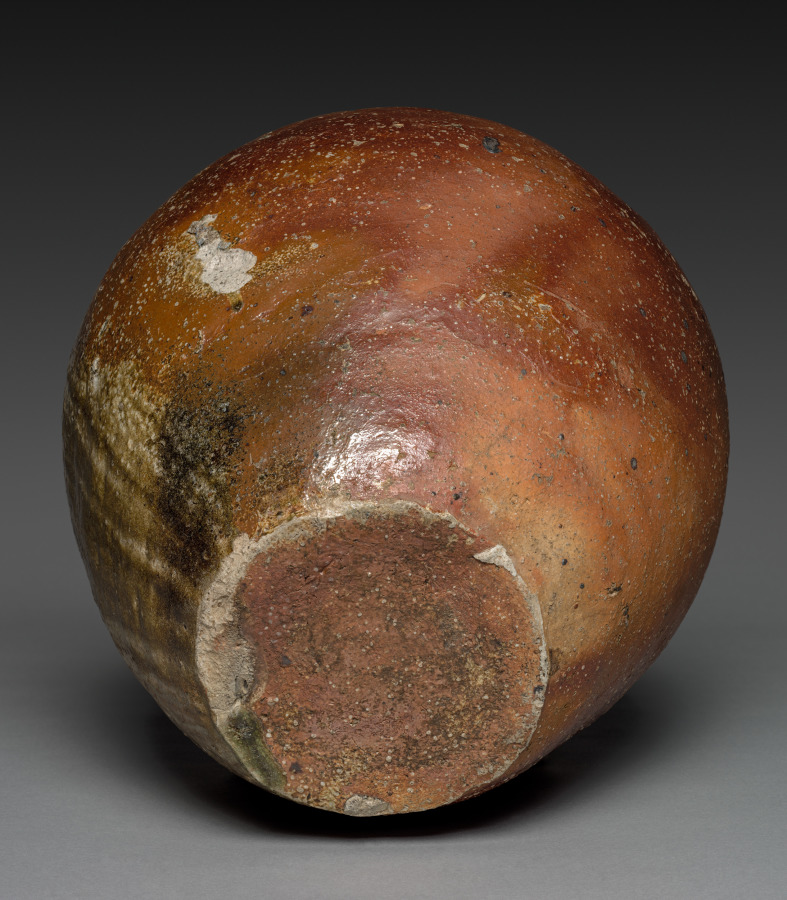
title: Storage Jar (Tsubo)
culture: Japan, Muromachi period (1392–1573)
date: late 1400s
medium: Stoneware with natural ash glaze (Shigaraki ware)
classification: Ceramic